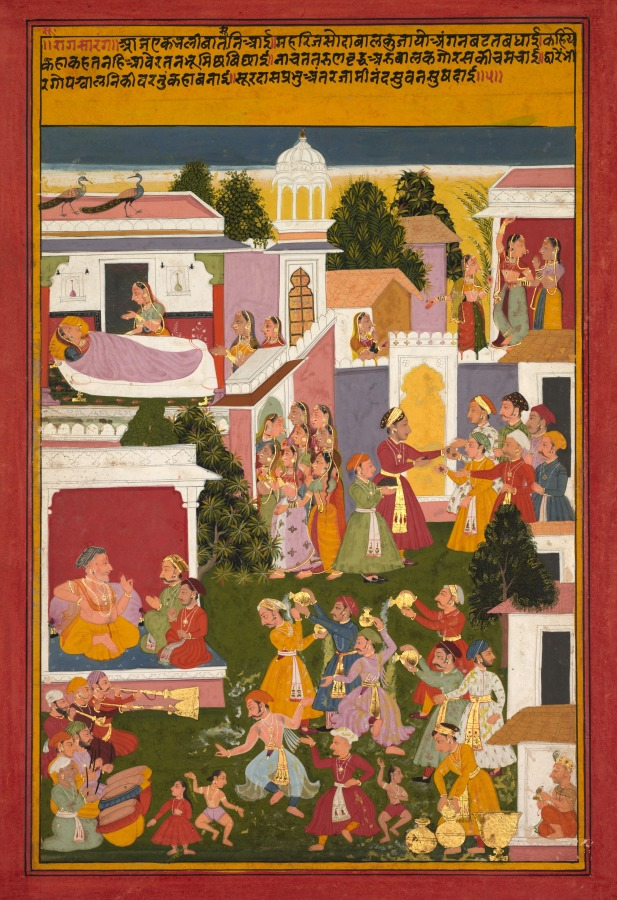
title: The Birth of Krishna, from a Sursagar of Surdas (Indian, c. 1480–1580)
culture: Northwestern India, Rajasthan, Rajput Kingdom of Mewar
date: 1705–10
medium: Gum tempera, ink, and gold on paper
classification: Painting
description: The blind poet and Hindu saint Surdas (1578/79–c. 1581), a devotee of Krishna, is shown in the hut at the lower right corner playing cymbals to measure meter as he recites his poem, called Sursagar. Verse 5 is written at the top of the page, and the scenes of festivities surrounding the arrival of the newborn Krishna are depicted throughout the rest of the painting. His adoptive mother Yashoda lies with the infant in the chamber at the upper left. His dark skin led to his being named Krishna, meaning dark, and shown as blue. Women clamor at her door to see the baby, as the men of the village receive silver coins being distributed on behalf of Nanda, the village elder and Krishna’s adoptive father, who is seated at the left receiving two well-wishers. Below, men and children of the cowherd village celebrate by pouring pots of curds and ghee over each other and dancing to the sounds of horns and drums.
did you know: Many poets in Udaipur styled themselves as "Surdas."